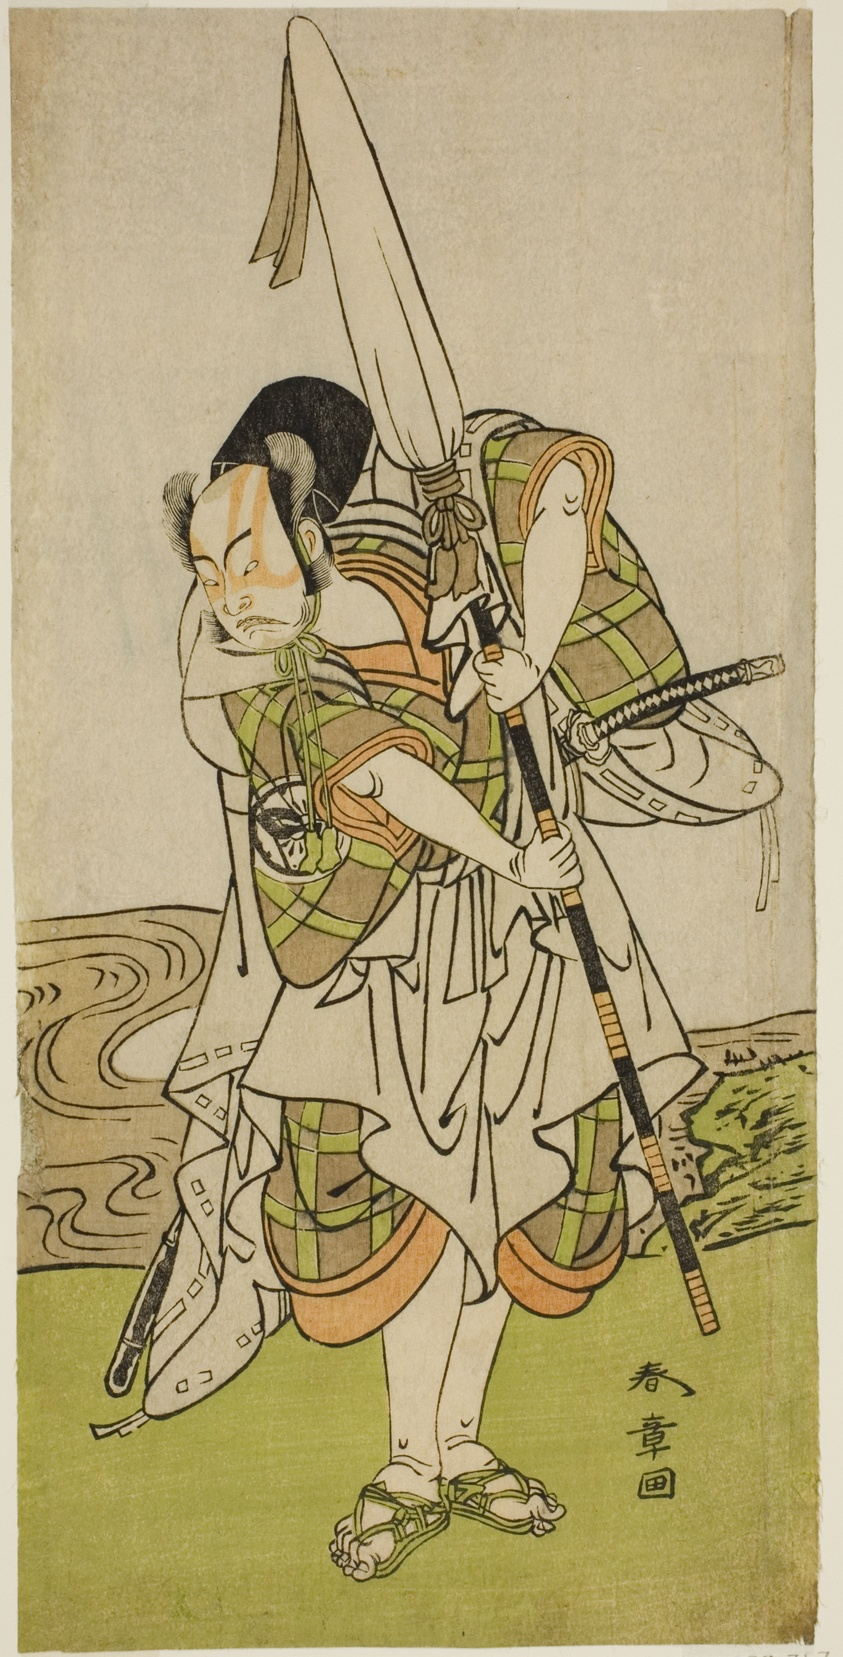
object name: Print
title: The Actor Nakamura Juzo II as Asahara Hachiro Disguised as the Servant of a Princely Family, in the Play Onna Aruji Hatsuyuki no Sekai, Performed at the Morita Theater in the Eleventh Month, 1773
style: Japanese (culture or style)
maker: Katsukawa Shunsho 勝川 春章; Japanese, 1726-1792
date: c. 1773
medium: Color woodblock print; hosoban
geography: Japan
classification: woodblock print; print; asian art